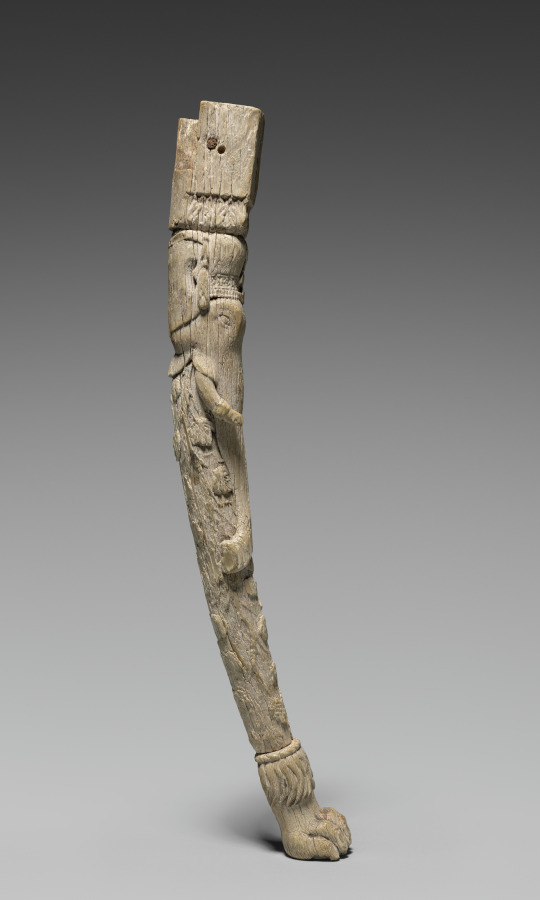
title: Chair Leg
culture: Afghanistan, Begram, Kushan period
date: 300s CE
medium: ivory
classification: Ivory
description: This ivory carving was made to sheath wooden furniture made in India for trade along the Silk Road, which stretched from Rome to China. Indian ivory-faced furnishings--along with lacquer boxes from China and painted glass from Rome--were found in an extraordinary deposit of luxury goods at a site called Begram. The wood on which the ivory and lacquer were affixed has long disintegrated, and only the small pieces remain.